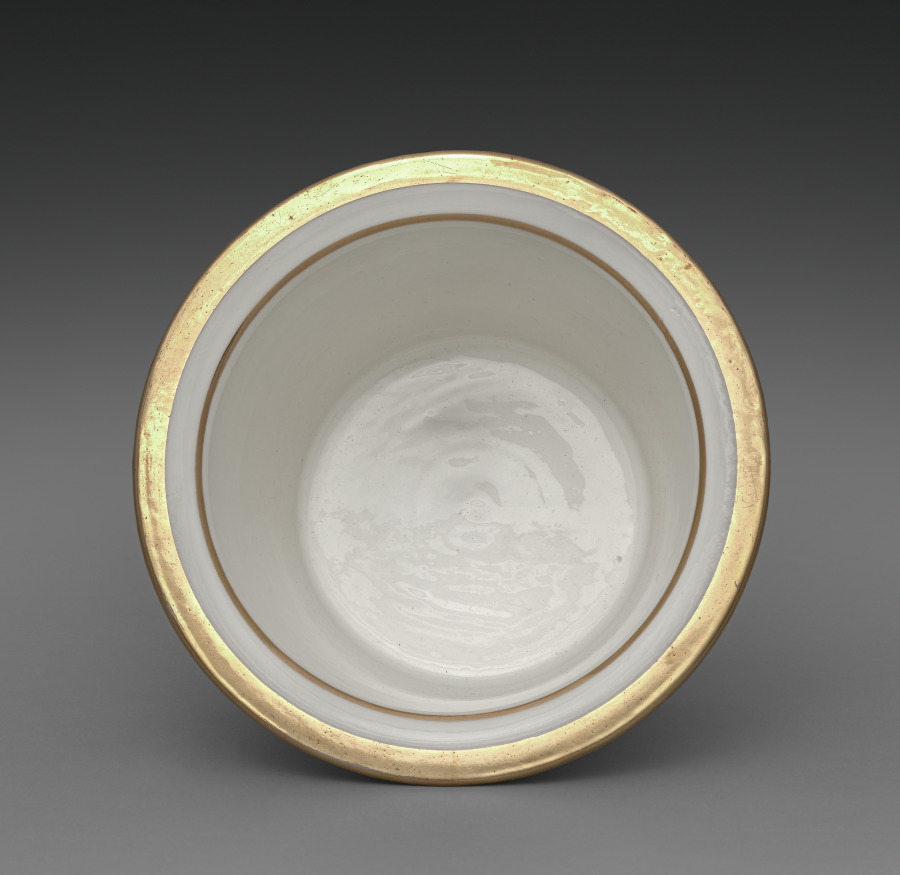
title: Liner for an Ice Cream Pail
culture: France, Paris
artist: Factory of Jacob-Petit (French, 1830–1865)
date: c. 1840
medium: gilt porcelain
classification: Ceramic